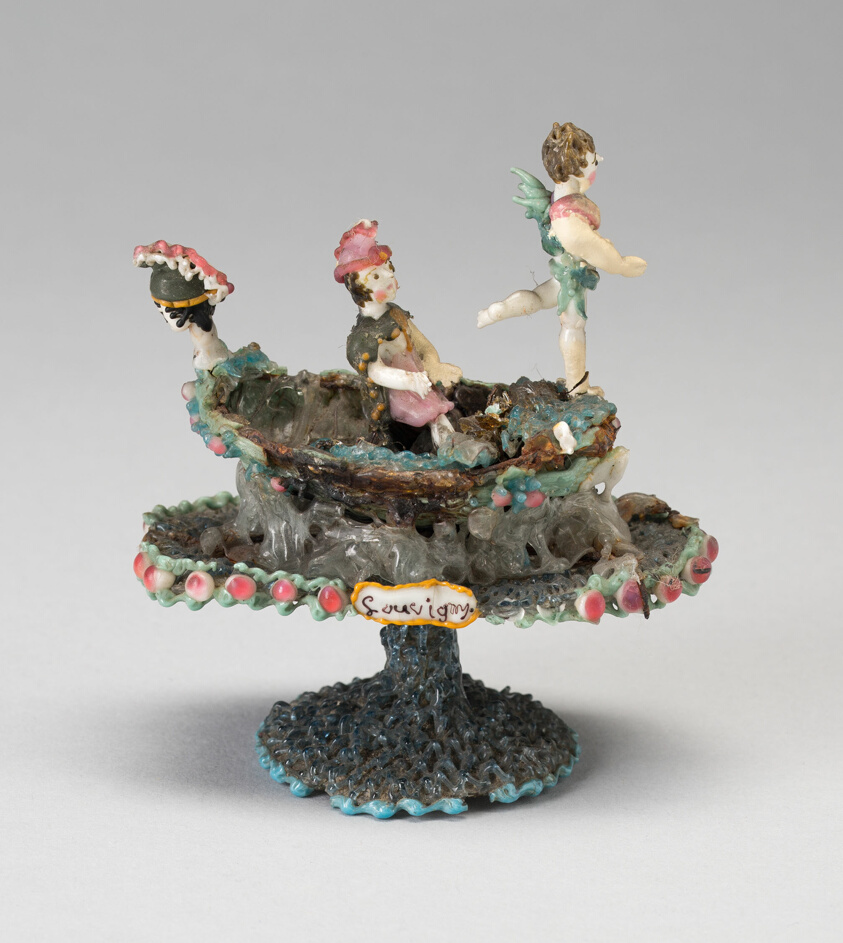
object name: Glass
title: Boat of Love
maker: Nevers, France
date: Early 19th century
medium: Glass; lampwork (verre de Nevers), metal armature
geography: France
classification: glass; miniature; decorative object/ornament; european decorative arts